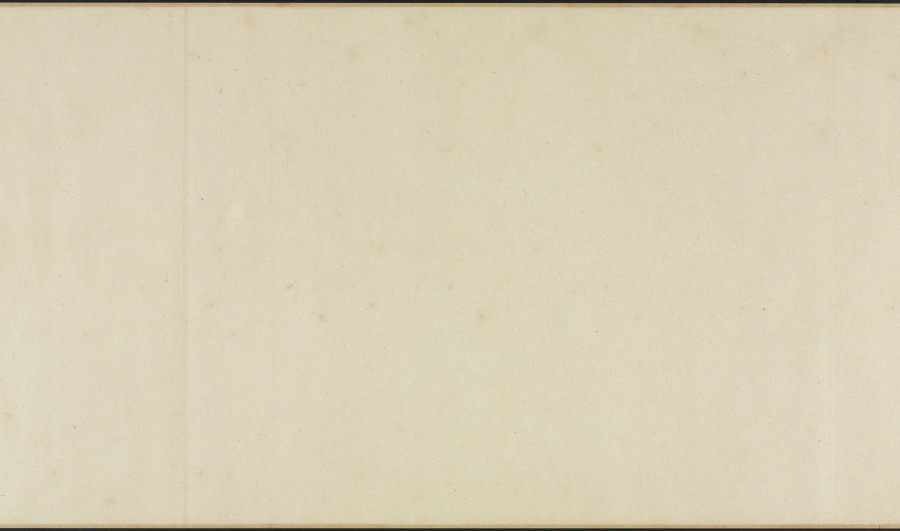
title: Water Village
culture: China, Ming dynasty (1368–1644)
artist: Wen Boren (Chinese, 1502–1575)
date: 1570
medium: handscroll; ink and light color on paper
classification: Painting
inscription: 隆慶庚午秋仿趙文敏筆. 五峰文伯仁 [印] 五峰山人; 文伯仁印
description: In the autumn of 1570, Wen Boren painted this seemingly unemotional scene of low-lying marshlands with a chain of rounded mountains in the background. A fishing boat is nestled on the shore near the village. Although paths and bridges traverse the landscape, only two people are visible in the stillness. From the restrained atmosphere of this landscape, one would never guess that Wen Boren was known as the “bad boy” of the Wu School for his explosive temper. As a younger man, he was even embroiled in a contentious lawsuit with his own uncle, Wen Zhengming (1470–1559), a master of Ming dynasty painting with whom he had trained. The ideal of the scholar-painter, or literati, was that an artist’s moral character is reflected in his paintings, so there was great incongruity between Wen Boren’s difficult personality and his restrained landscapes. A contemporary, Wang Shizhen, wrote this about him: "This gentleman is prone to behave odiously and screamed accusations at people. How is it possible for him to carry in his bosom such a wealth of scenic wonders?" Who knows what effort it took to subdue his fractious spirit to project an image of coolness and refined taste in his paintings?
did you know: A foreground tree has an eccentric twisting silhouette and pepper-dot "halo" of leaves.